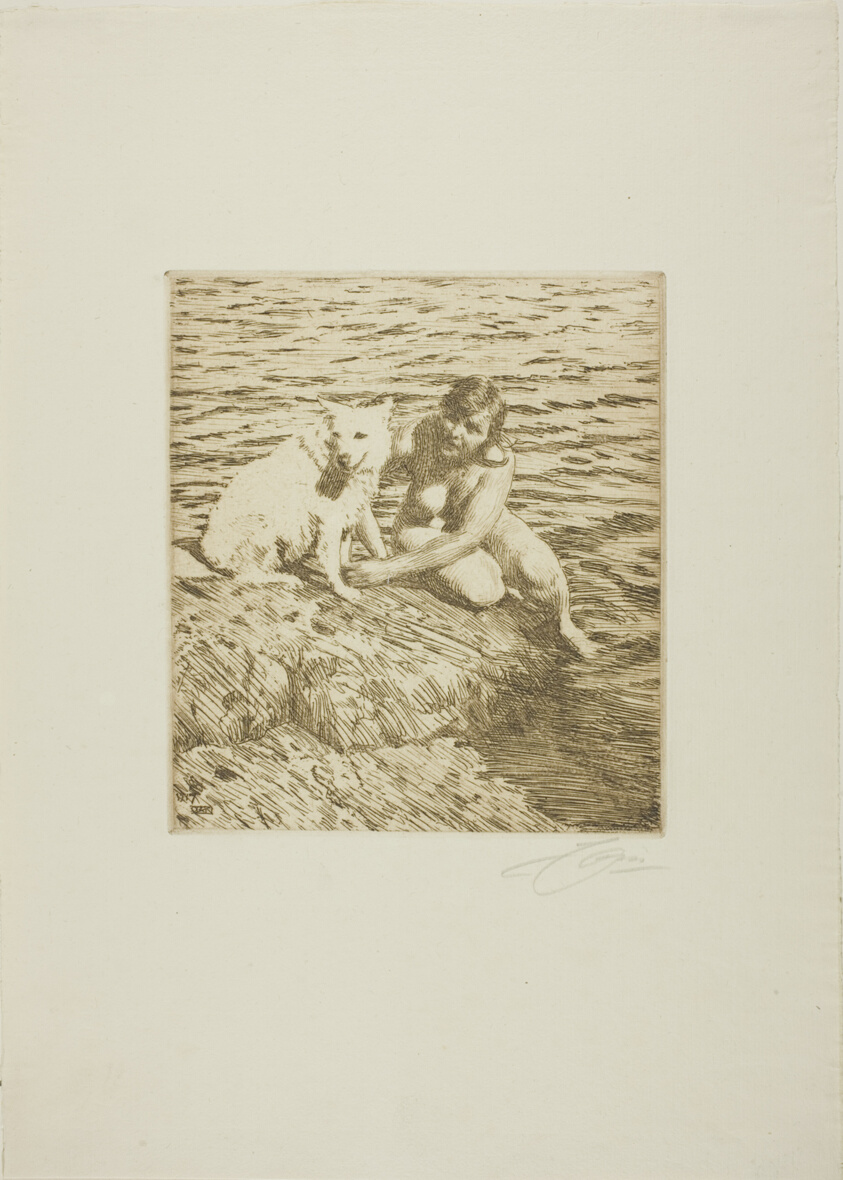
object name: Print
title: Sappo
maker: Anders Zorn (Swedish, 1860-1920)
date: 1917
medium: Etching in brown ink on cream laid paper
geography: Sweden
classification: etching; print; prints and drawing